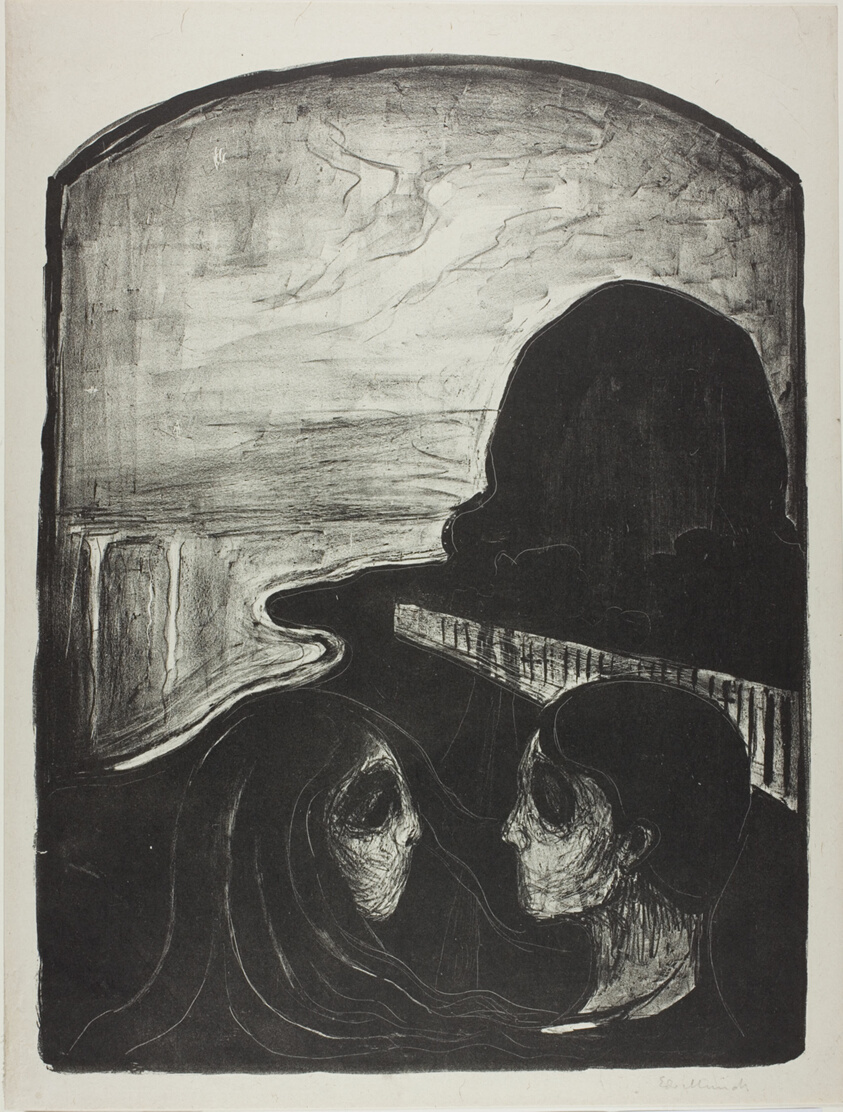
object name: Print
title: Attraction I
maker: Edvard Munch (Norwegian, 1863-1944); printed by Auguste Clot (French, 1858-1936)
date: 1896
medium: Lithograph in black ink on grayish-ivory China paper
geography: Norway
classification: lithograph; print; prints and drawing